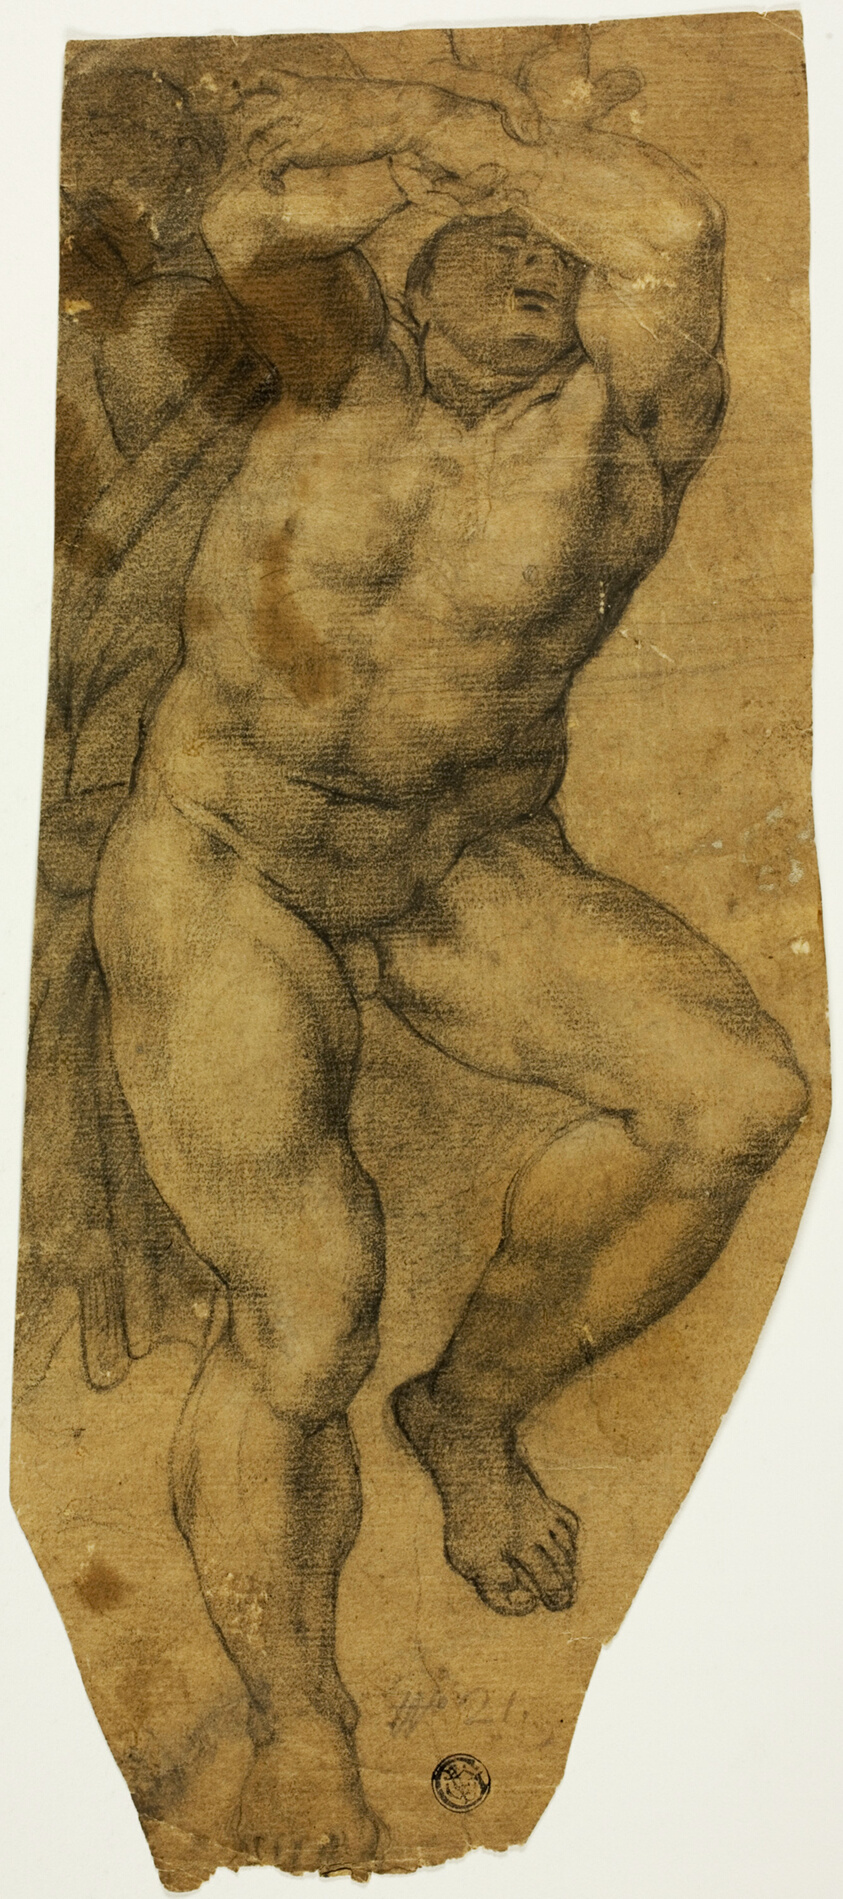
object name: Drawing and Watercolor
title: Ascending Male Nude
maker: After Michelangelo Buonarroti; Italian, 1475-1564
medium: Black chalk on tan laid paper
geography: Italy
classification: chalk; drawings (visual works); prints and drawing